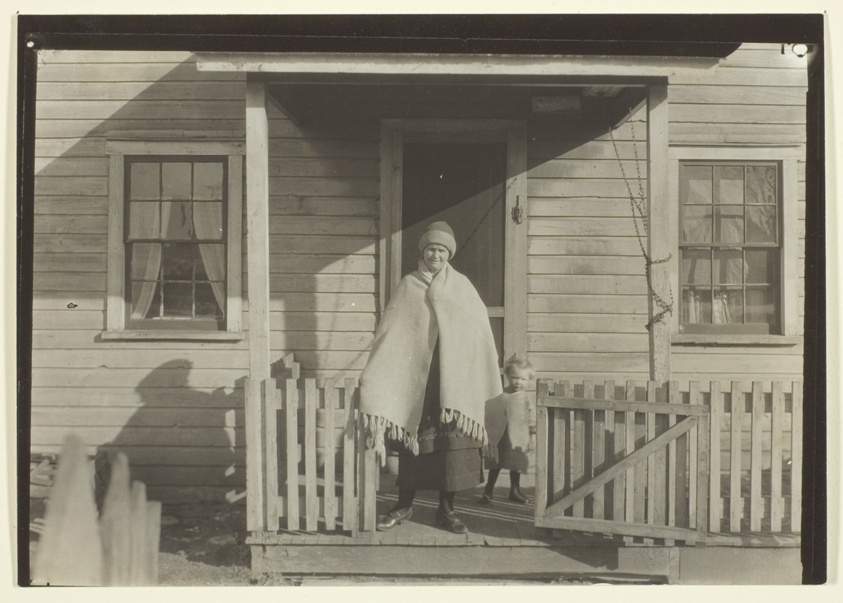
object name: Photograph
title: Wife, Child, and Home of Pennsylvania Coal Miner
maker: Lewis Wickes Hine (American, 1874–1940)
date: 1920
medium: Gelatin silver print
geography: United States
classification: gelatin silver (developing-out-paper) pr; photographic process; photography; photograph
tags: Collected by Hugh Edwards